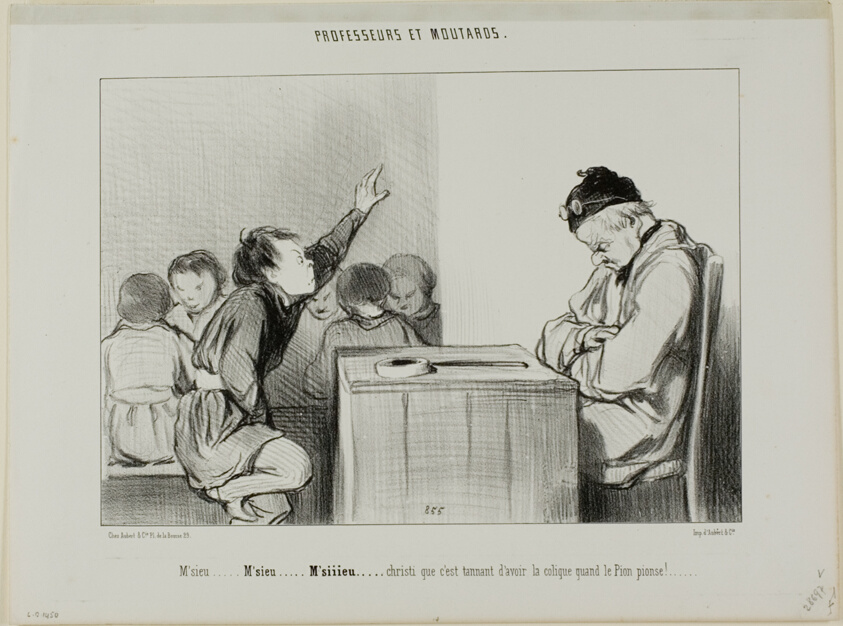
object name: Print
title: “Sir... Sir... Siiiirrrr... Christ, it's annoying to have a colic when the supervisor is supervising,” plate 13 from Professeurs Et Moutards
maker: Honoré Victorin Daumier; French, 1808-1879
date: 1846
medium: Lithograph in black on white wove paper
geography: France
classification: lithograph; print; prints and drawing